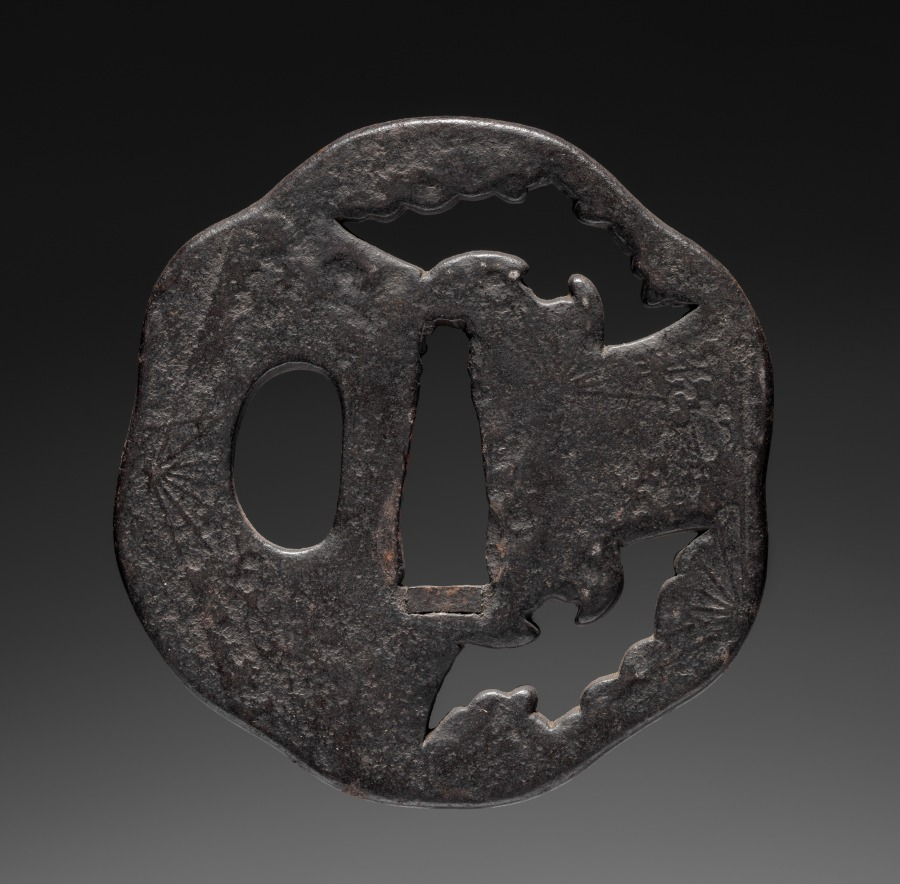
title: Sword Guard (Tsuba) with Bats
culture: Japan, possibly Edo period (1615-1868)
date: c. 1615–1868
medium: iron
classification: Arms and Armor